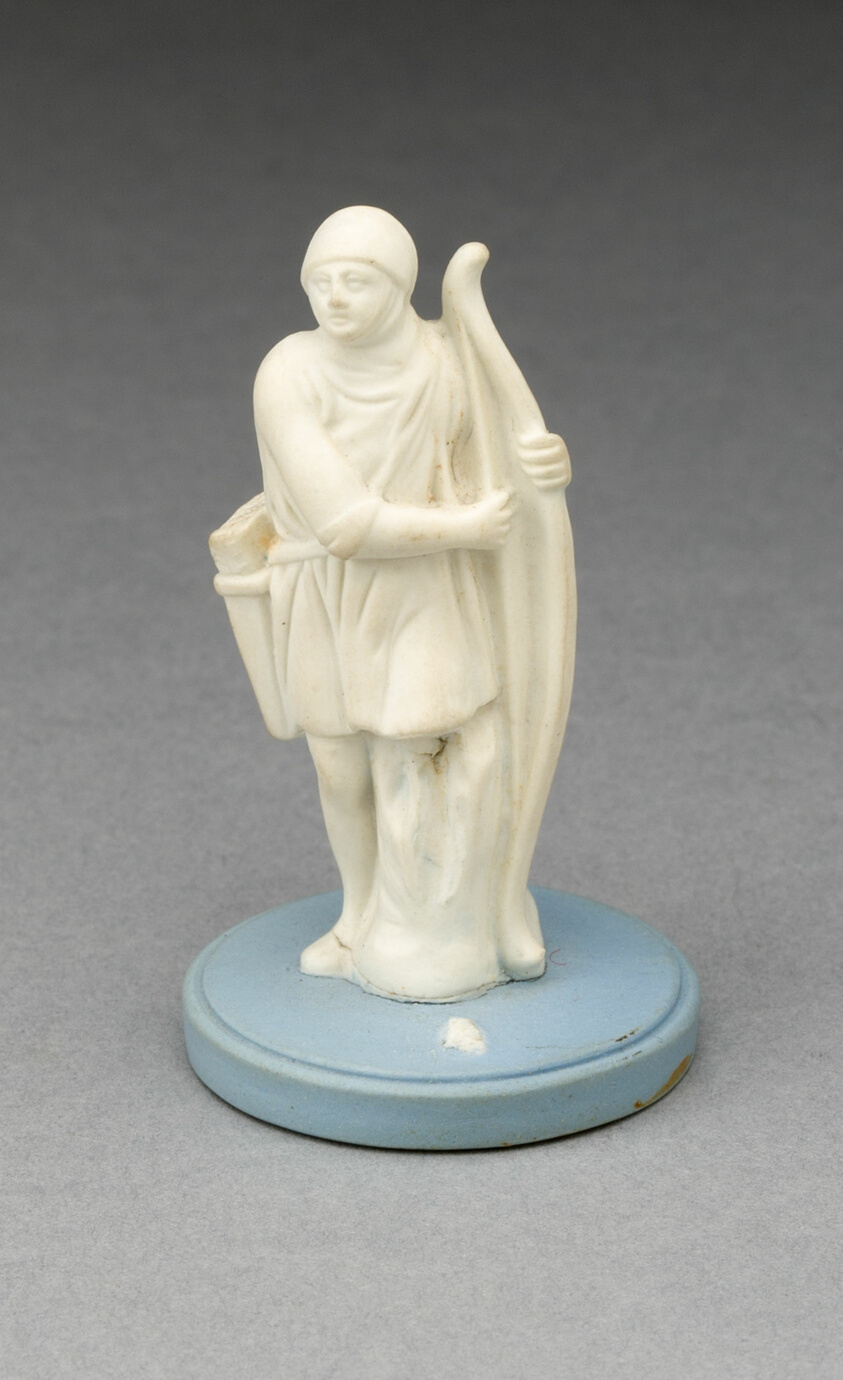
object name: Ceramics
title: Chess Piece: Pawn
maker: Wedgwood Manufactory (England, founded 1759)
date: 19th century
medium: Stoneware (jasperware)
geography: Burslem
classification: accessories (object genre); stoneware; european decorative arts; ceramics